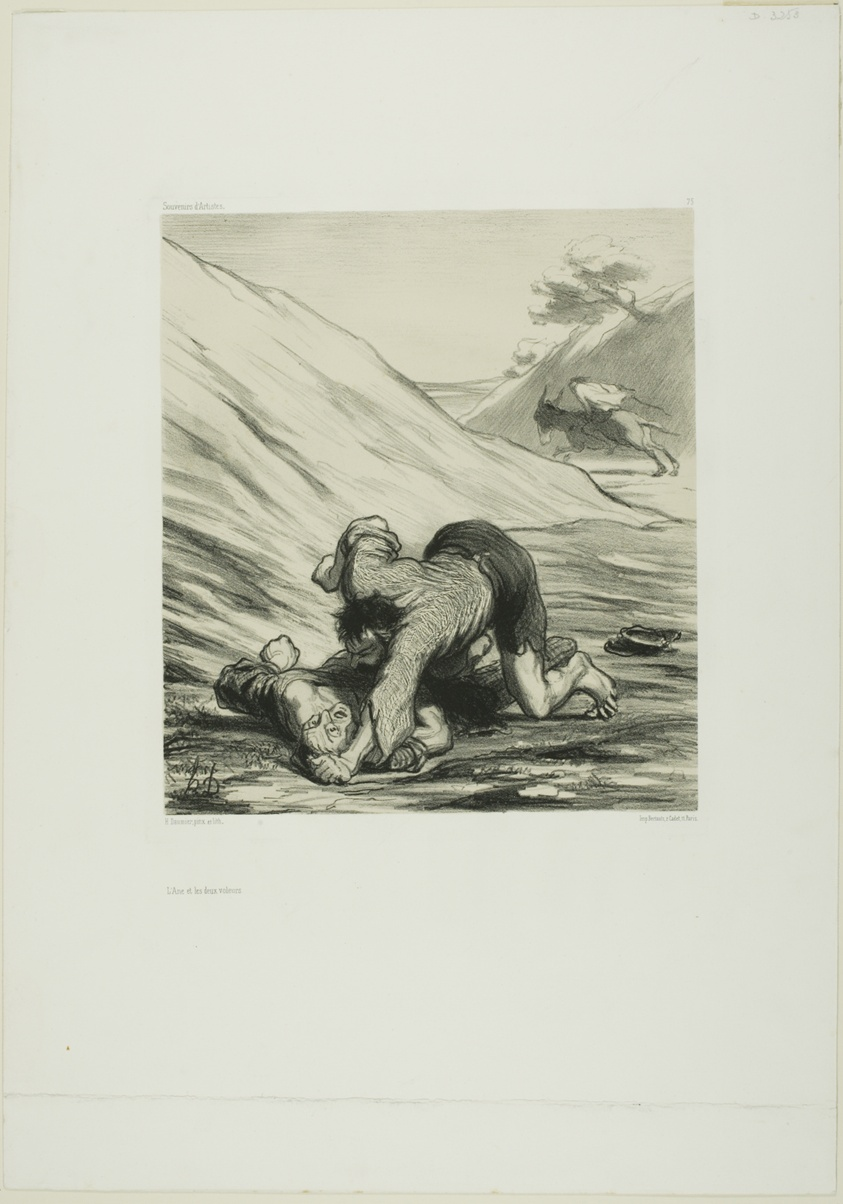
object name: Print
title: The Ass and Two Thieves, plate 75 from Souvenirs d’artistes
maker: Honoré Victorin Daumier (French, 1808-1879); printed by Bertauts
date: 1862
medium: Lithograph in black, with scraping on stone and with fawn tint stone on ivory wove paper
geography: France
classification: print; lithograph; prints and drawing